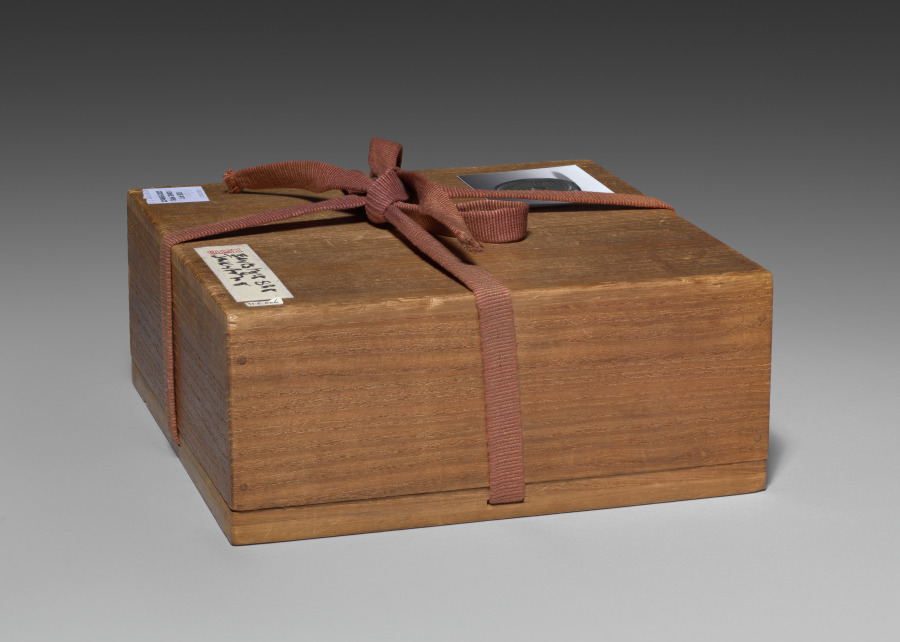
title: Inkstone in the Shape of a Roof Tile with Seal Script Characters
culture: China, Qing dynasty (1644–1911)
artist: Workshop of Jian Guzhai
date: 1700s–1800s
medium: She stone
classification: Stone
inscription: 七葉永祥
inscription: 「鑑古齋仿製」 「穎川春暉館文寶」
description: This inkstone is particularly noteworthy for its inscriptions in two styles. The base shows four characters in seal script (zhuanshu) expressing auspicious, or favorable wishes, while the characters on the side in standard script (kaishu) record the name of the workshop and that of the collector’s studio. Inkstones were used to grind solid ink cakes with the addition of water to produce liquid ink for brush painting and calligraphy.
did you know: The four large seal script characters on the base of this inkstone, 七葉永祥, may be read as "eternal good fortune for seven generations."